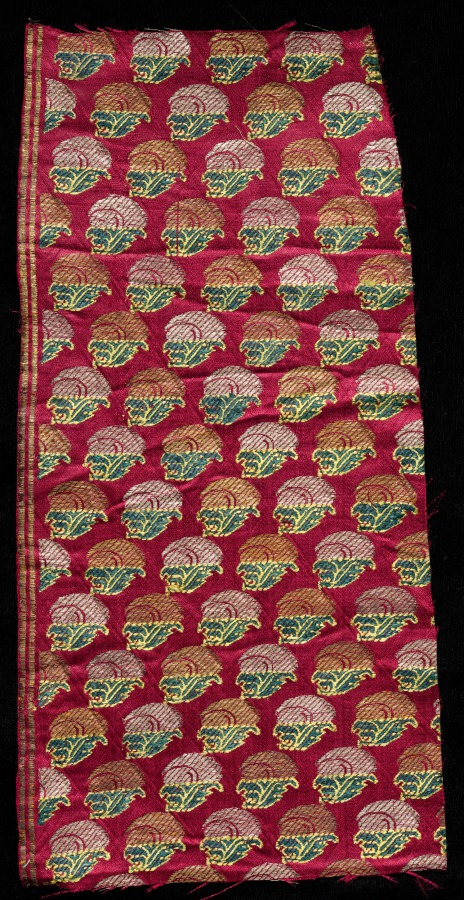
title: India, Surat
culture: India, Surat, 19th century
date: 1800s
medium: brocade; silk, gold and silver threads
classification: Textile